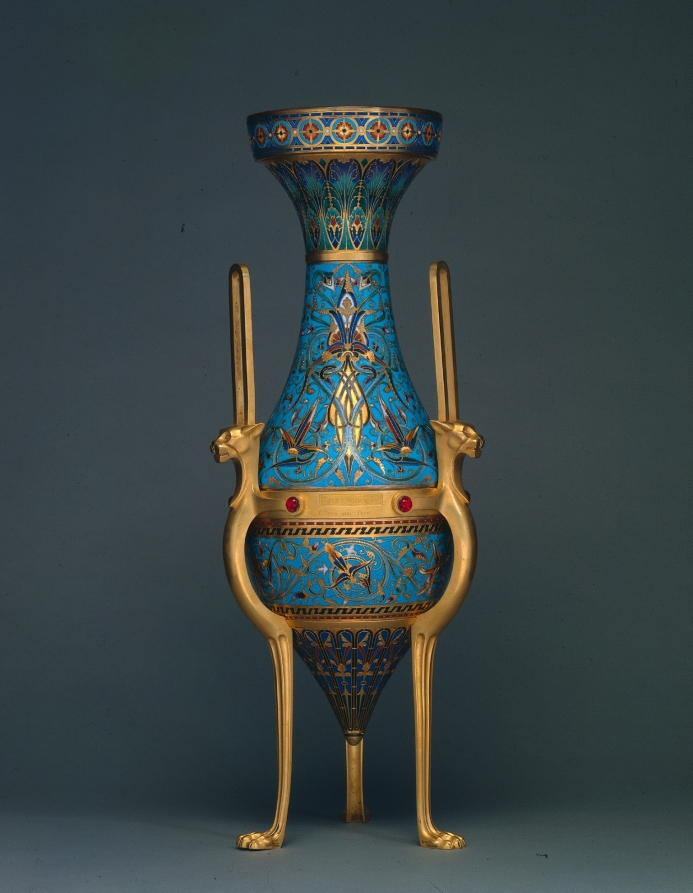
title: Vase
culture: France, 19th century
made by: Firm of Ferdinand Barbedienne (French, 1810–1892)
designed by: Louis-Constant Sévin (French, 1821–1888)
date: c. 1862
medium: gilt bronze with enamel decoration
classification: Metalwork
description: This vase vibrantly encapsulates the admiration for historical works of art and architecture that dominated the 1800s. It features stylistic qualities of ancient Egyptian, ancient Greek, and medieval Islamic art with its cat legs, amphora shape, and spiraling foliage ornamentation. The enameling technique itself, called champlevé, has roots in the ancient world. Champlevé enameling involves carving out sections of metal before filling those areas with colored enamel. The vase model was introduced at the International Exhibition of London in 1862, and its popularity resulted in several color and shape variations.